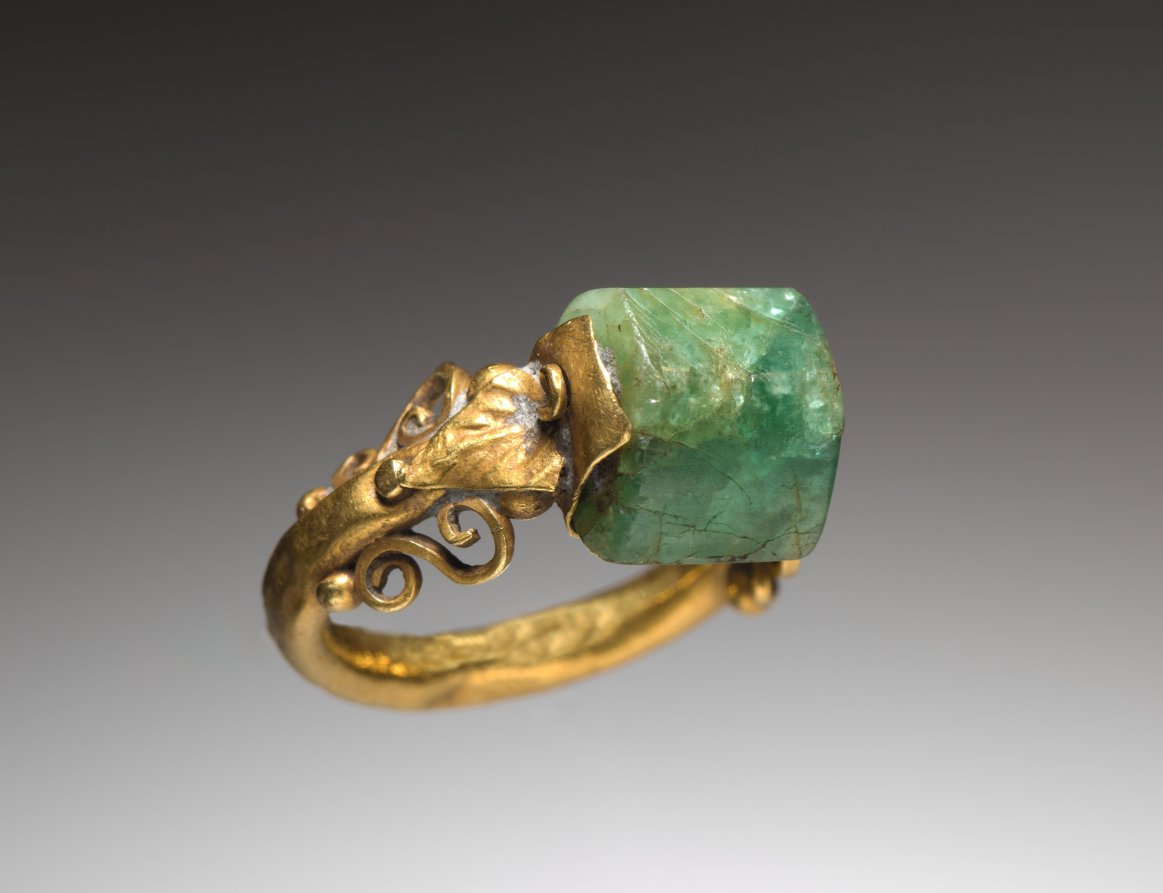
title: Ring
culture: Byzantium (style of), probably 19th-20th century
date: probably 1800s-1900s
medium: gold and jade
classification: Jewelry